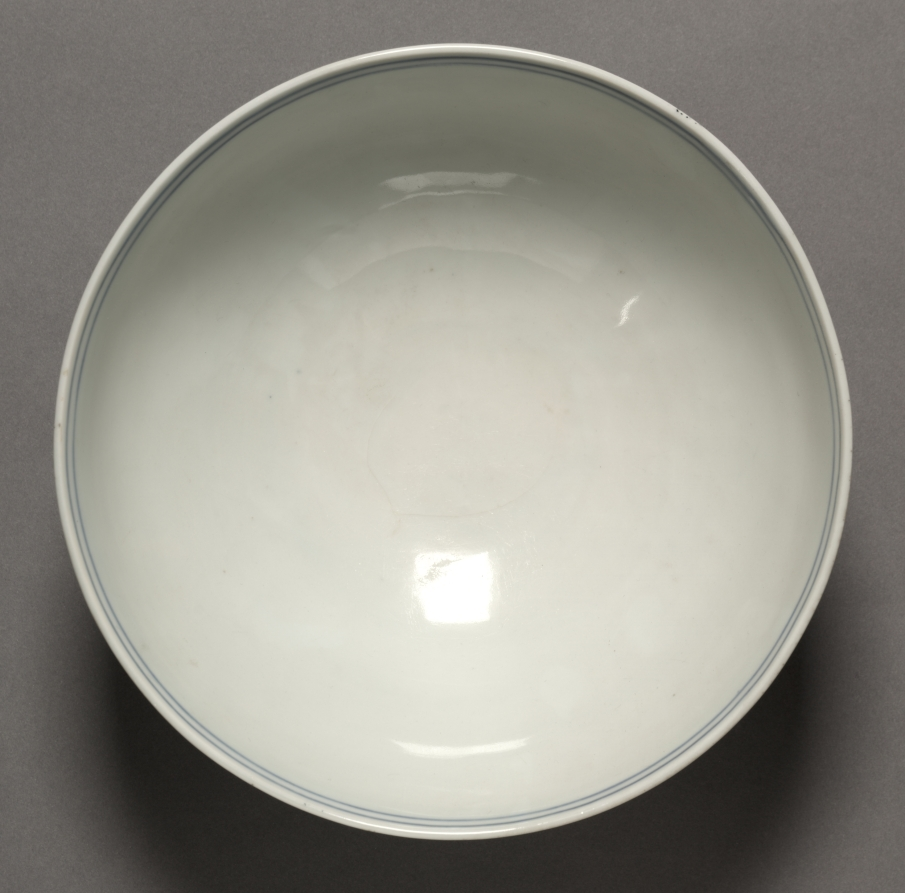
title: Bowl (wan) with Water Plants and Arabesques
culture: China, Jiangxi province, Jingdezhen kilns, Ming dynasty (1368-1644), Zhengde mark and reign (1506-21)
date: 1506–21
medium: porcelain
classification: Ceramic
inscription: 正德年製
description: Arabesques, an ornamental design of intertwined flowing lines inspired by Middle Eastern culture, appear on Chinese blue-and-white porcelain since the 1300s. The early Ming emperors, particularly the Zhengde emperor, promoted Islam and commissioned porcelain with Islamic calligraphy.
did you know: Chinese potters integrated foreign motifs, shapes, and ideas in order to cater to changing tastes and new customers in an increasingly global world.